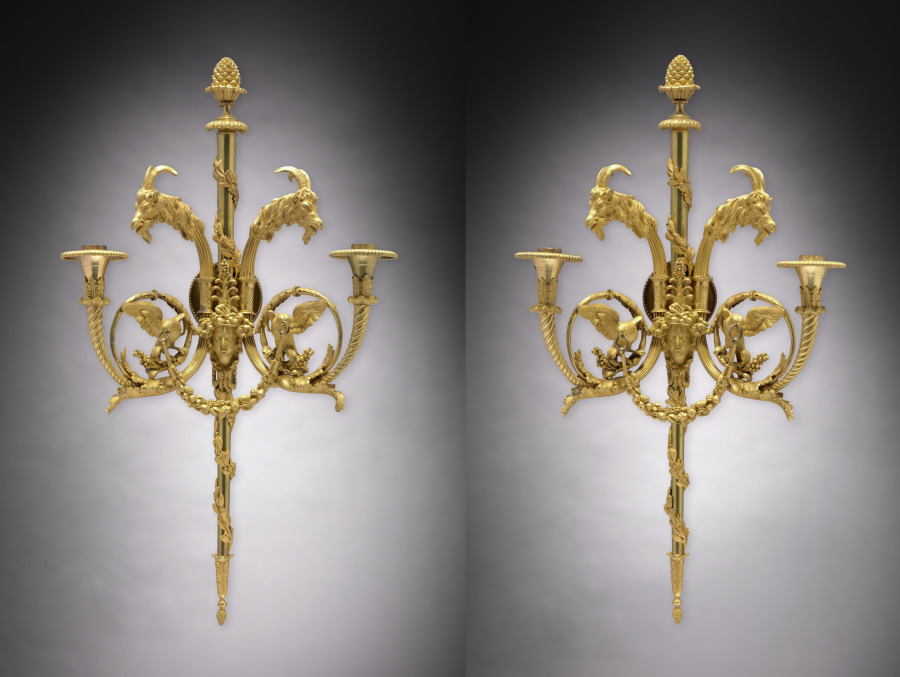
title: Candle Bracket Pair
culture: France, style of Louis XVI, 18th Century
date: c. 1780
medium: gilt bronze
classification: Furniture and woodwork